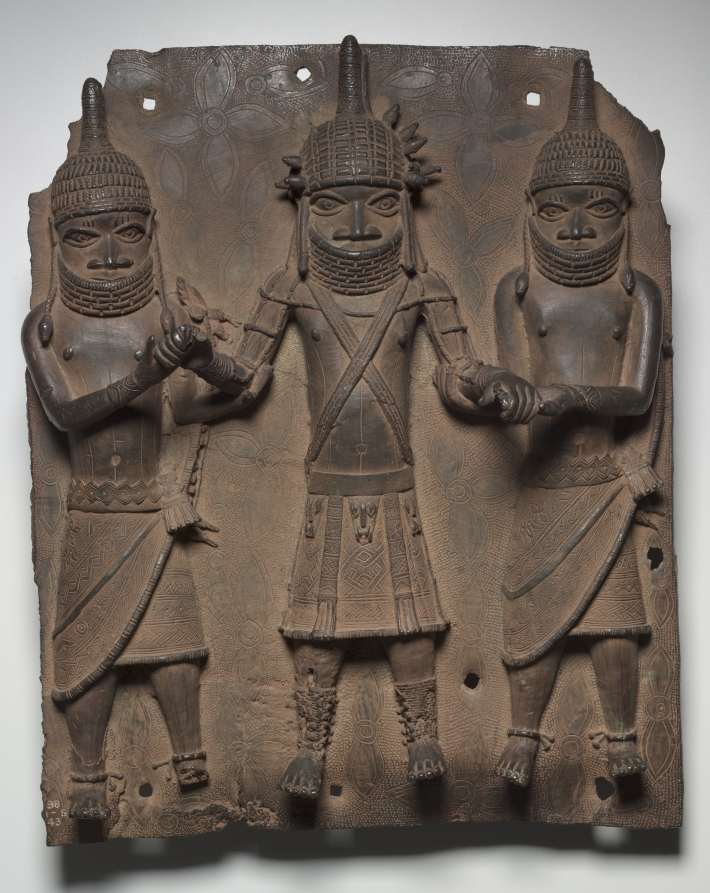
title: Plaque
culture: Nigeria, Benin Kingdom, Ẹdo peoples, members of the Igun Eronmwon (royal brasscasters) guild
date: 1500s–1600s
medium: Copper alloy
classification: Sculpture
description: Nearly 900 metal plaques once adorned the Ọba’s palace courtyard, documenting Benin’s history and customs. This one depicts two male attendants (enobore) supporting an Ọba. It uses hierarchical composition: important figures are large and centered. Everything about the Ọba is greater than his companions: their bodies, clothing, and jewelry. The flanking attendants physically support a man weighed down by heavy royal garments and responsibilities. Brasscasters skillfully cast their clasping hands projecting from the plaque. The bottom left number means the British Museum formerly owned this. It entered their collection in 1898, one year after British troops took it from a palace storeroom during the Siege of Benin.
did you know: Look at the side of this plaque. The designs on the slender edges are considered visual "signatures" of the different casters who made plaques for the Oba of Benin.